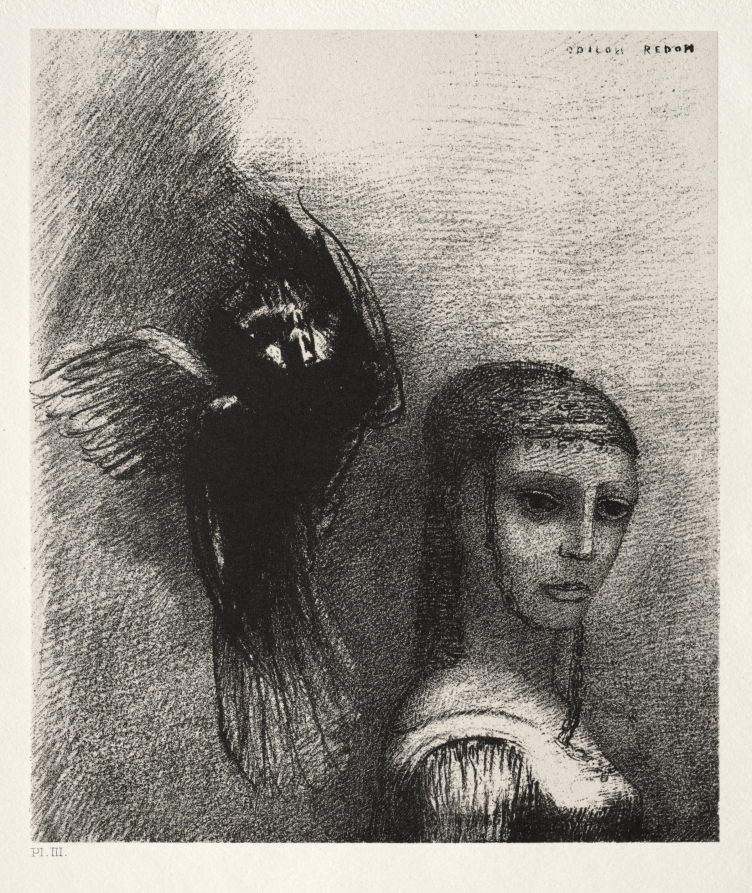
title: And a Large Bird, Descending from the Sky, Hurls Itself against the Topmost Point of Her Hair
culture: France, 19th century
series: The Temptation of Saint Anthony (First Series)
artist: Odilon Redon (French, 1840–1916)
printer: Becquet (French)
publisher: Edmond Deman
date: 1888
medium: lithograph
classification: Print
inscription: printed at lower left, below image: Pl. III / Et un grand oiseau qui descend du ciel vient s'abbatre sur le sommet de sa chevelure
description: This portfolio is one of three made by Odilon Redon inspired by avant-garde writer Gustave Flaubert’s novel The Temptation of Saint Anthony (1874). Captivated by the book’s fantastical account of moralizing tests encountered by a hermit in the desert, Redon executed charcoal drawings and attempted to evoke that medium’s dense blackness in his lithographs. Based on the text’s darkly imaginative tone rather than its actual content, the works in this series present invented monsters and figures in otherworldly settings with jarring tonal variations. Although Redon felt that the prints effectively translated the surreal universe of his source material, they were largely misunderstood in his own time.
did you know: Publisher Edmond Deman commissioned this portfolio after he saw an 1886 exhibition of Redon's work in Brussels, Belgium.